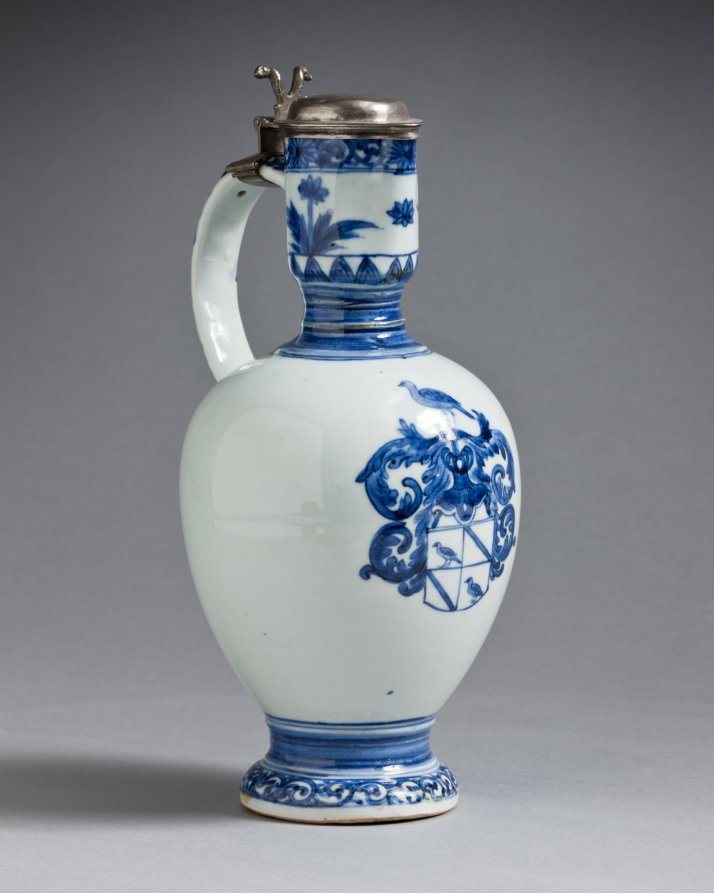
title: Jug with Silver Mounts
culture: Japan, Edo period (1615–1868)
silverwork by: Barent van Leeuwen (Dutch, 1637–1682)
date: c. 1662–76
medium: porcelain with underglaze blue decoration and silver mounts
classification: Ceramic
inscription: [on silver]: town mark for Amsterdam; lion rampant crowned (alloy mark for 0-934 silver); d (date letter for 1666), maker's mark of Barent van Leeuwen.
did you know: The coat of arms on this jug are those of the Valckenier family, active in the Dutch East India Company.